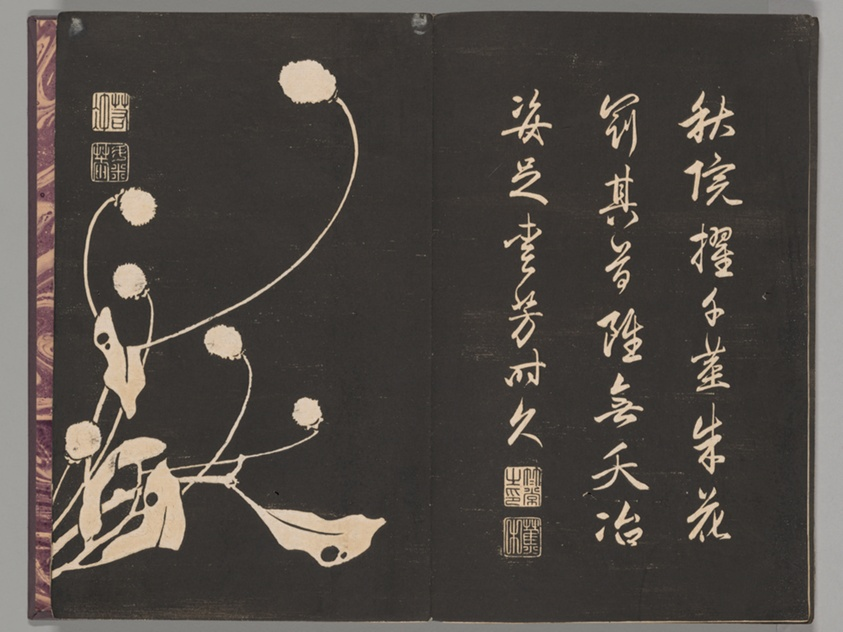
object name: Book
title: Soken sekisatsu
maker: Ito Jakuchu (Japanese, 1716-1800)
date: 1767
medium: Woodblock printed book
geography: Japan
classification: book